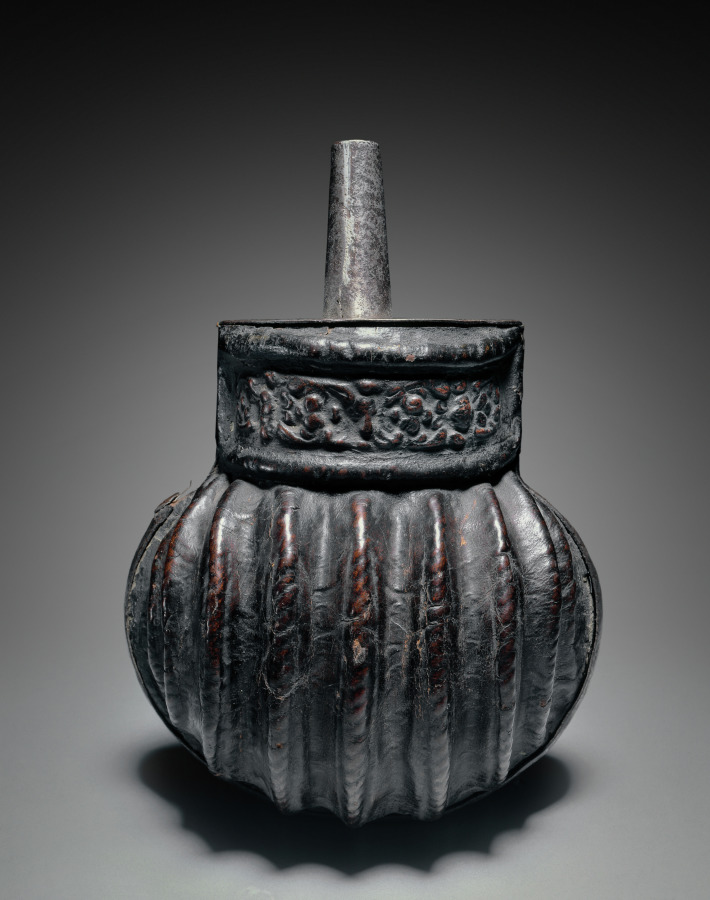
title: Powder Flask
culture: Italy, late 16th century (?) questionable authenticity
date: 1500s(?)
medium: leather (cuir bouilli); modern steel mounts and fitting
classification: Arms and Armor